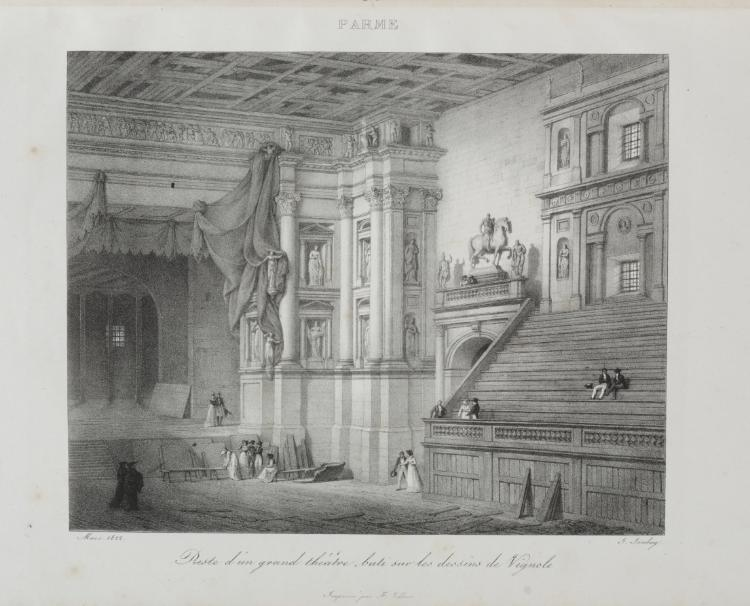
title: Voyage en Italie en 1822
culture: France, 19th century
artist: Jean-Baptiste Isabey (French, 1767–1855)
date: 1833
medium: lithograph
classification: Bound Volume